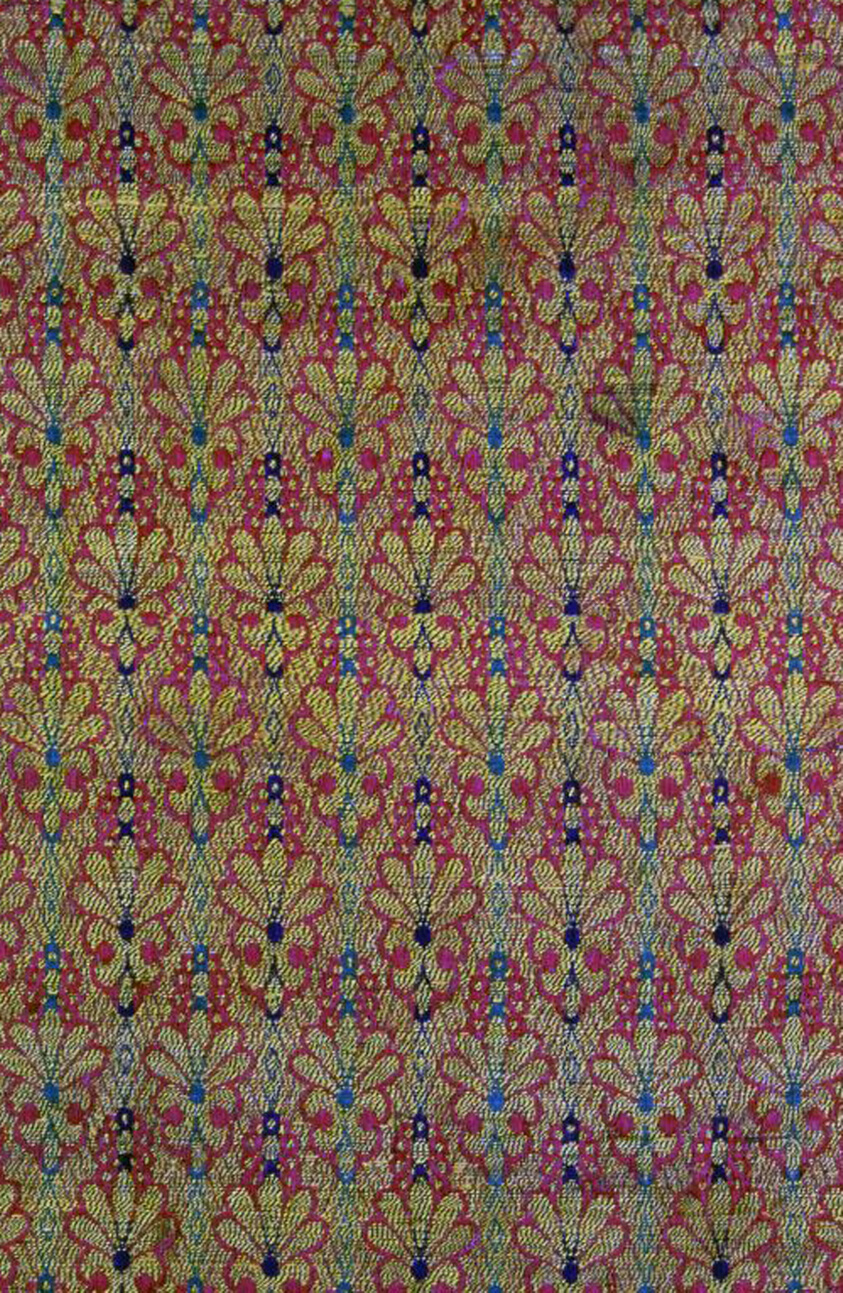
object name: Textile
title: Panel (Dress Fabric)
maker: Near East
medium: Cotton and gilt strip wound around cotton fiber core; irregular binding float weave; composed of eleven fragments joined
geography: Middle East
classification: textile; weaving